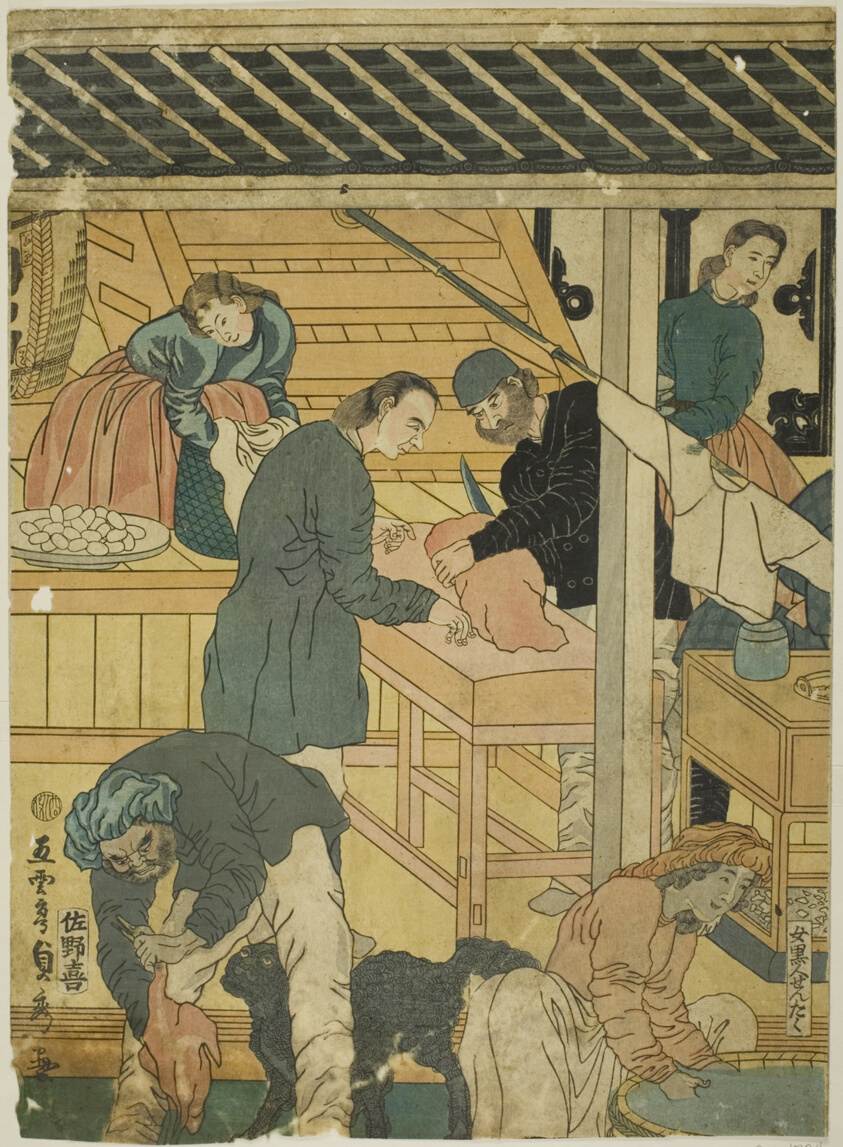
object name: Print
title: Sales Room at a Foreign Merchant Shop in Yokohama (Yokohama ijin shokan uriba no zu)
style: Japanese (culture or style)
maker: Utagawa Sadahide (Japanese, 1807-1873)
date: 1861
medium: Color woodblock print; right sheet of oban triptych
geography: Japan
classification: woodblock print; print; asian art